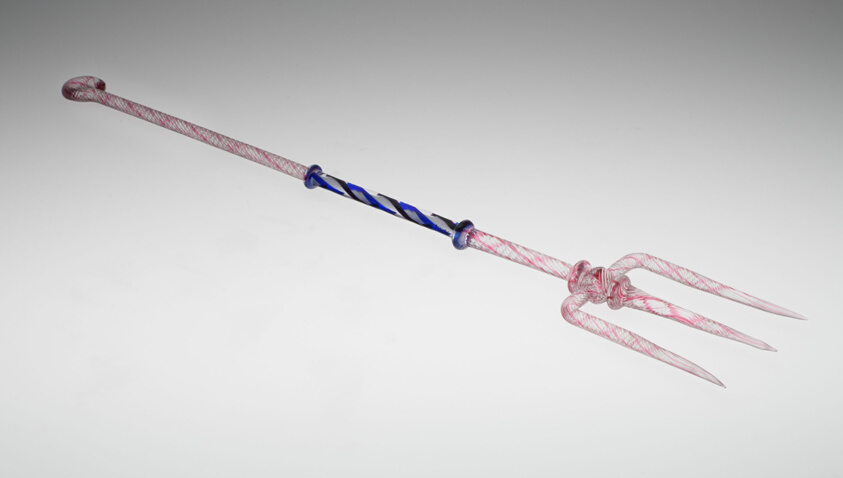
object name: Glass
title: Toasting Fork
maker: England, Bristol or Stourbridge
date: 19th century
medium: Glass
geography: Bristol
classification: fireplace equipment; european decorative arts; glass